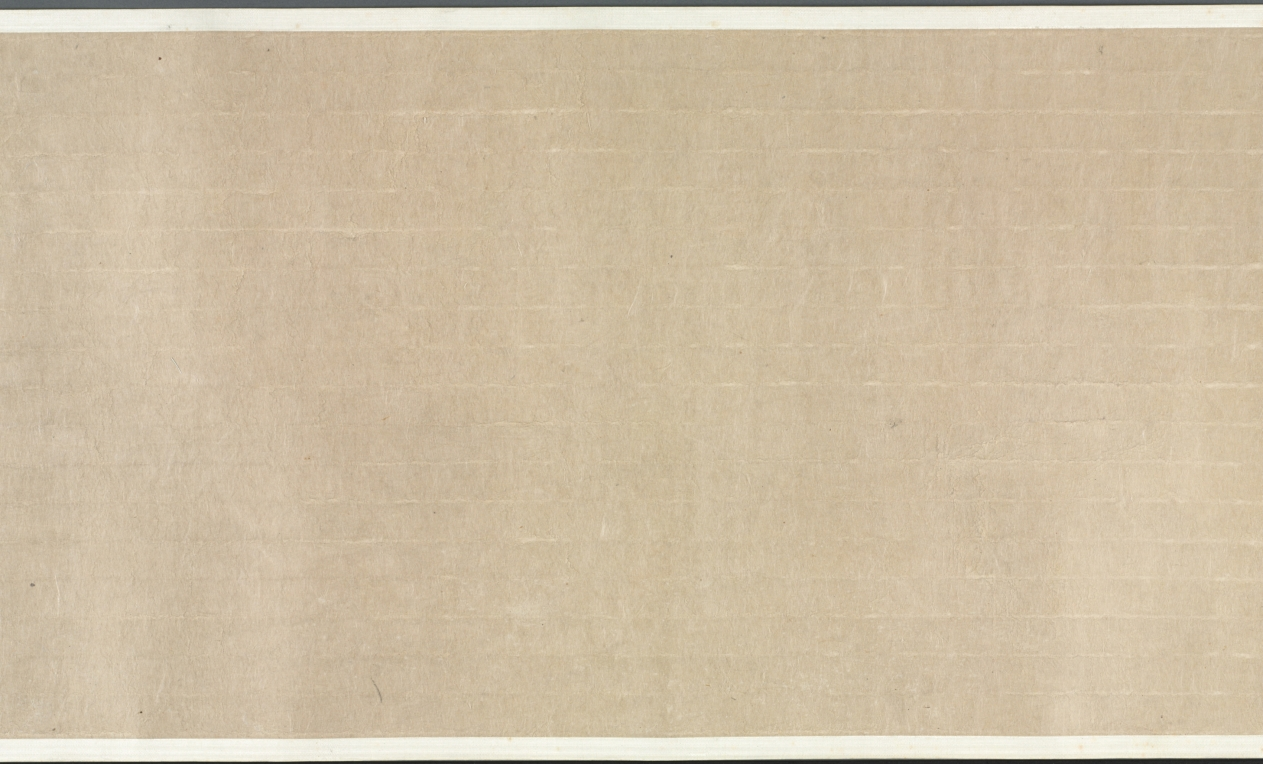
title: Buddha's Conversion of Five Bhiksu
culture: China, Yuan dynasty (1271–1368)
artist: Li Sheng (Chinese, active c. 1324–after 1375)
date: mid-1300s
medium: handscroll; ink on paper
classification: Painting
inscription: 紫篔生李升識 [印] 李氏子雲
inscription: 4 colophons and 12 additional seals: The "Heart" Sutra (Maha Prajnaparamita) text written by Wu Yuqing 吳餘慶 (active early 1400s); 2 seals of Xu Qianxue 徐乾學 (1631–1694); 3 colophons, one dated 1929 and two dated 1936, and 9 seals of Wu Hufan 吳湖帆 (1894–1968); 1 colophon, dated 1932, of Chen Dingshan; 1 seal unidentified.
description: This episode stems from the life of the historical Buddha, who, after his enlightenment, was initially hesitant about preaching his own doctrine. After much personal deliberation and prodding by deities, he finally relented. The first converts were the five guards who served him when he was still a prince. For Li Sheng, this is the pretext of the painting, which moves from the interaction of the bhiksu with the Buddha to a broader awareness of the vast surroundings of the scene.